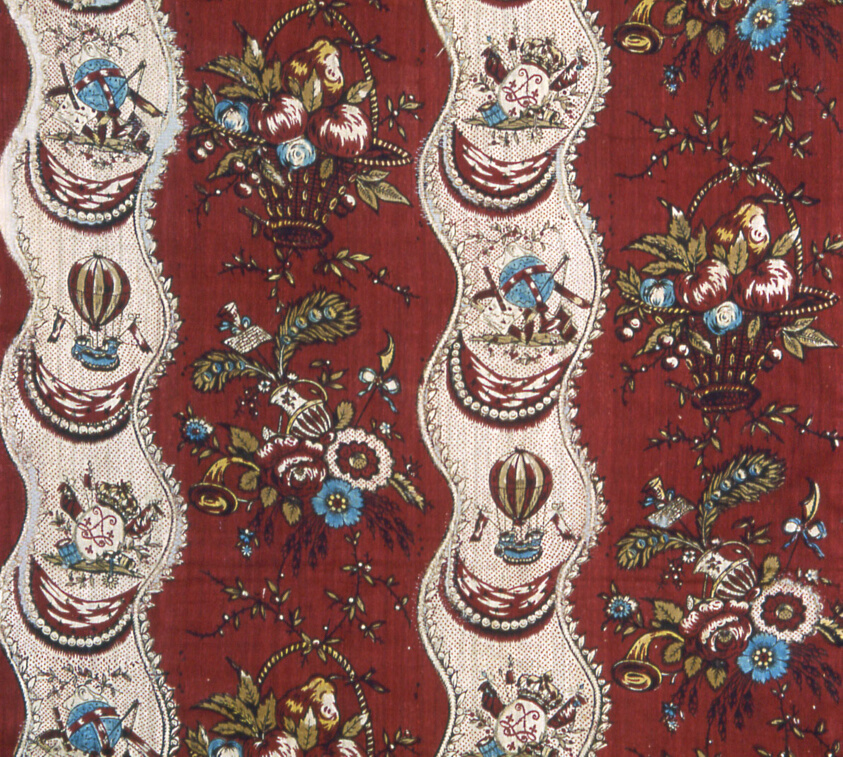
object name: Textile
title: Panel (Furnishing Fabric)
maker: France, Nantes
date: c. 1785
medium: Cotton, plain weave; block printed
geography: Nantes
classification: textile; weaving - printed; weaving; furnishing textile